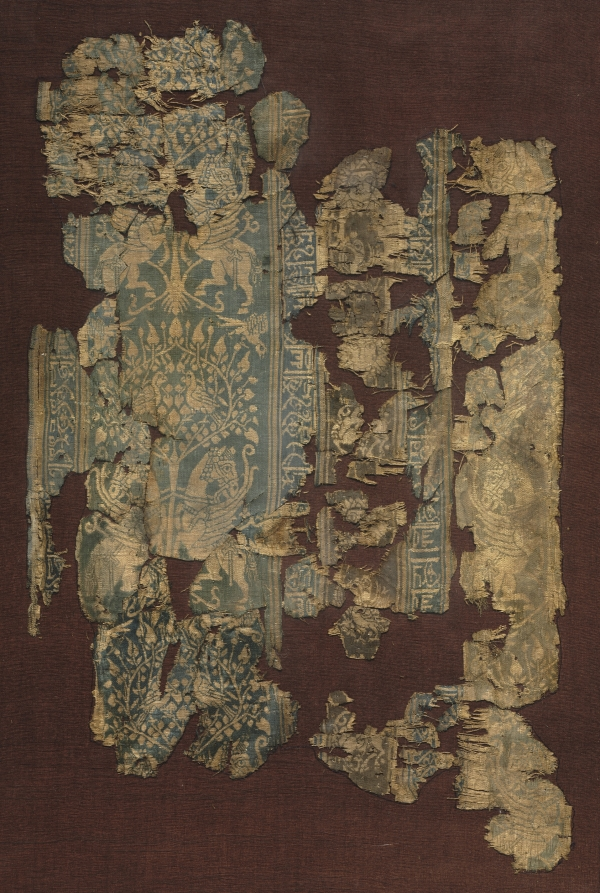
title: Silk fragment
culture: Egypt or Iran, Ayyubid period, 1100s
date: 1100s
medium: lampas: silk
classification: Textile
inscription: Design of lengthwise bands of ornament between bands of inscription which duplicate each other and read: "To owner victory and kingdom."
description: Silk of double cloth weave with design of lengthwise bands of ornament between bands of inscription.